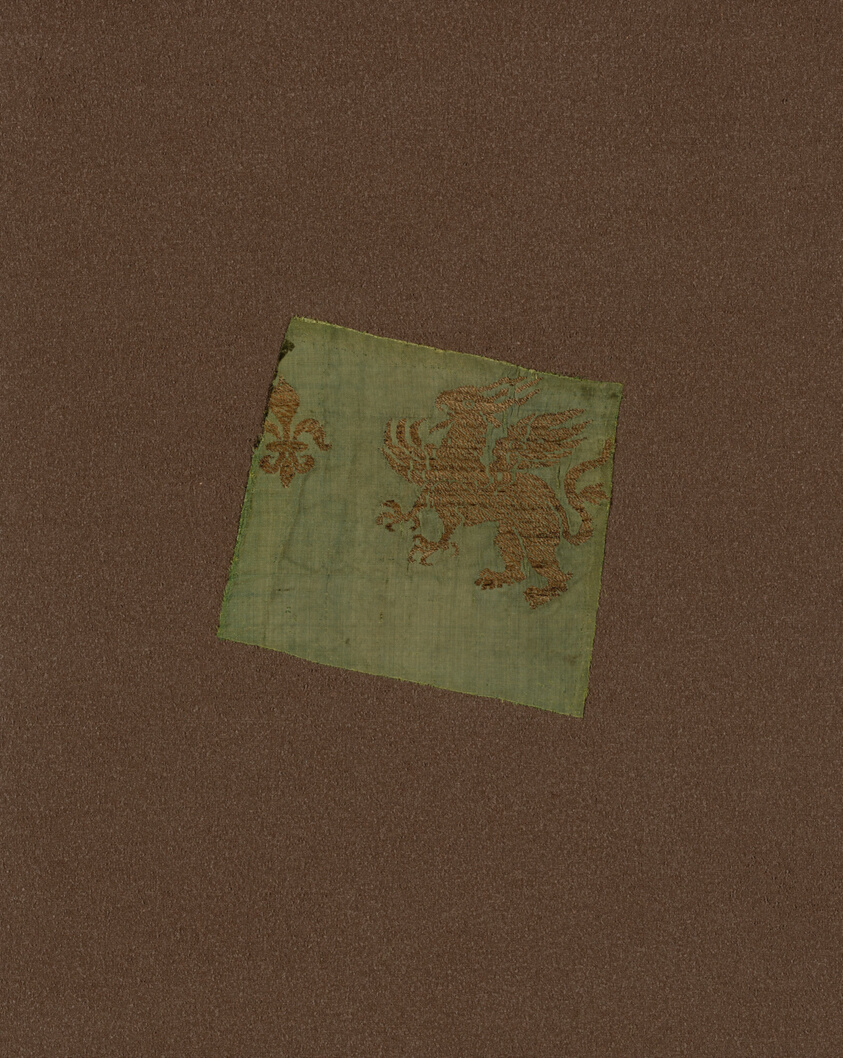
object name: Textile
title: Fragment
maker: Italy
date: 1325/75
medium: Silk and gilt-animal-substrate-wrapped silk, plain weave with supplementary brocading wefts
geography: Italy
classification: textile; weaving